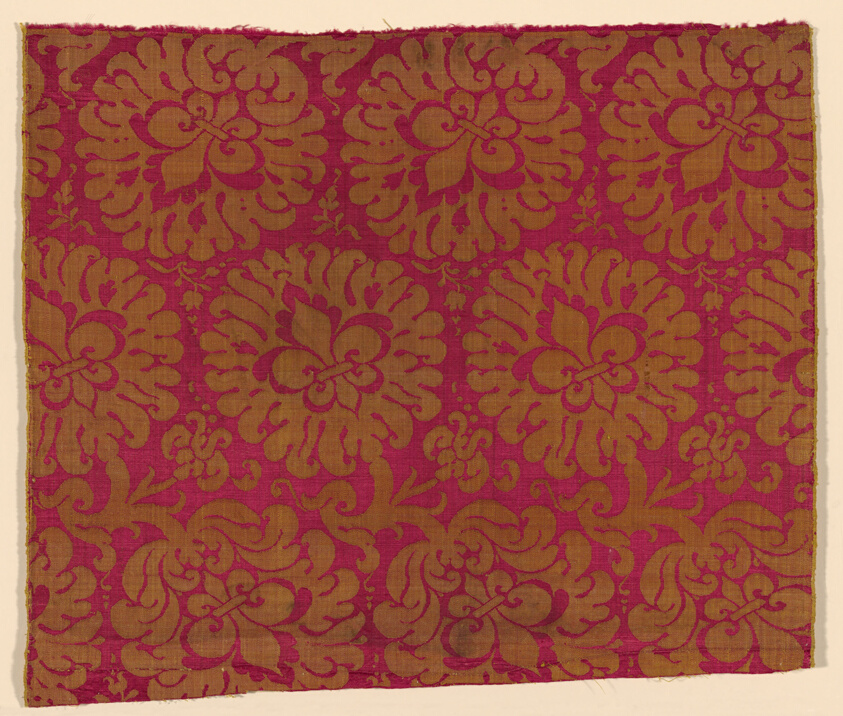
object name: Textile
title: Fragment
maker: France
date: 1601/25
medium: Silk, satin weave self-patterned by reversing of faces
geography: France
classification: textile; weaving